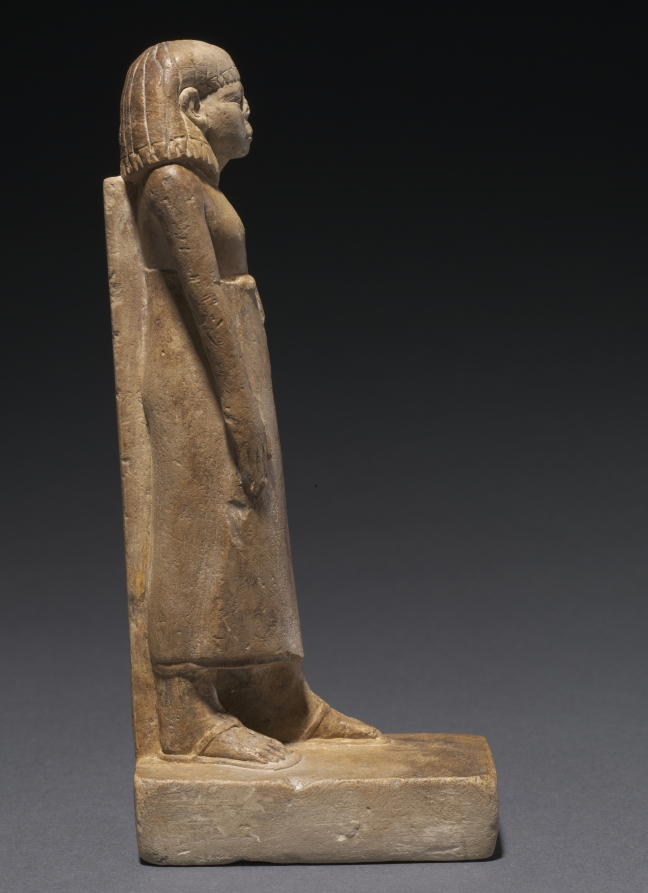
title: Statuette of a Man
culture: Egypt, Middle Kingdom (2040–1648 BCE), Dynasty 12, reign of Amenemhat III (1860–1814 BCE) or later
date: c. 1859–1648 BCE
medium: painted limestone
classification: Sculpture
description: This statuette is an example of the art of the Middle Kingdon in Egypt, which was characterized by tight, compact forms. The man represented here has his arms tucked close to his body and his shoulders raised to his wig. He is tightly wrapped in a long skirt with his feet barely separated. His posture and expression are tense and serious, reflecting the sobriety of this period in Egyptian art.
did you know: This figure has traces of white, red, and black pigment.